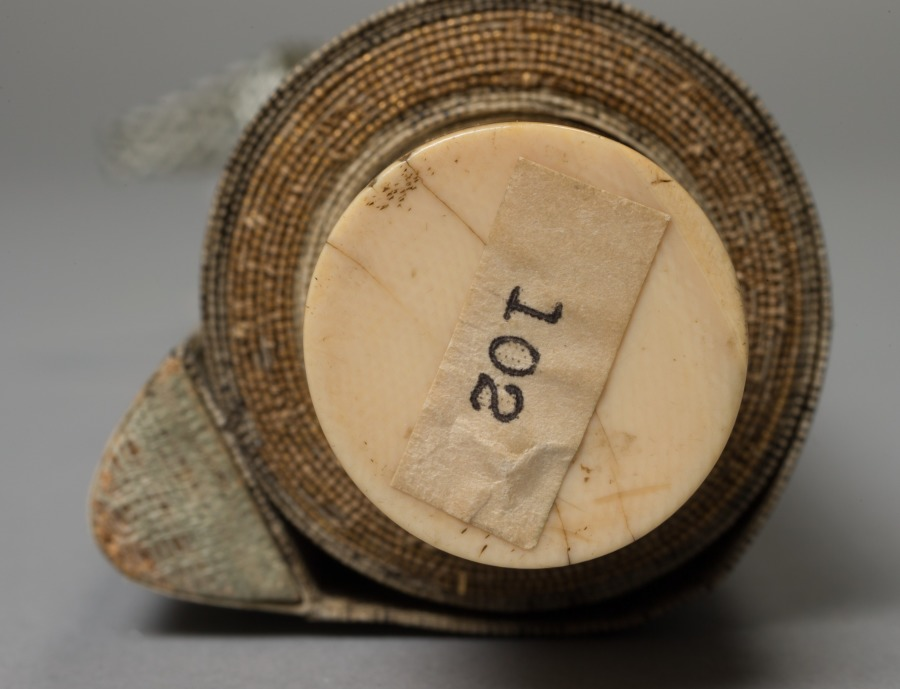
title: Wild Geese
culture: Japan, Muromachi period (1392–1573)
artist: Chōkichi (Japanese)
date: early 1500s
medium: hanging scroll; ink on paper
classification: Painting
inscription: Gourd-shaped seal of Chokichi at lower left